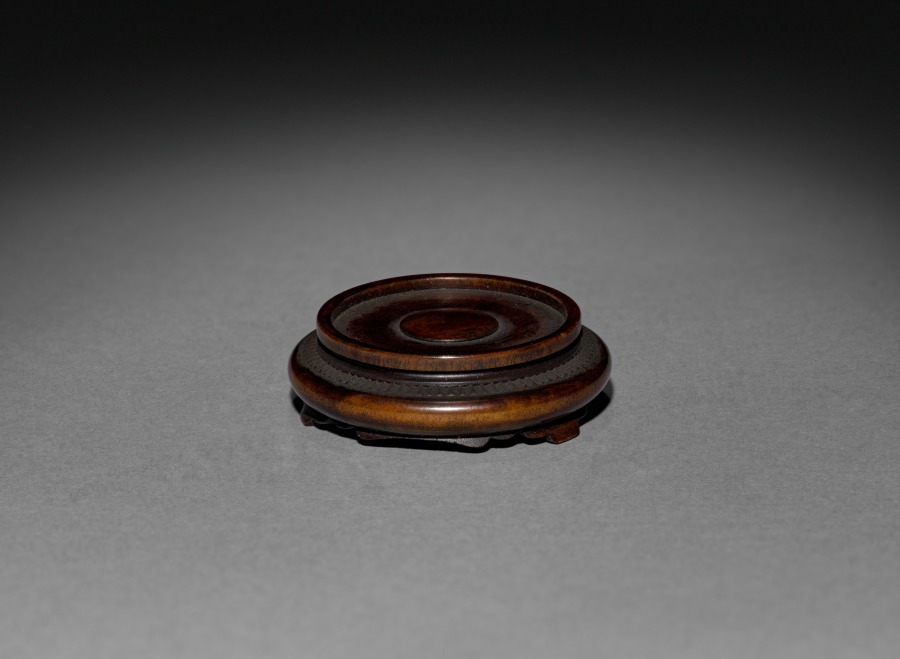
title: Snuff Bottle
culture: China, Qing dynasty (1644-1911)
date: 1644–1911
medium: glass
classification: Glass